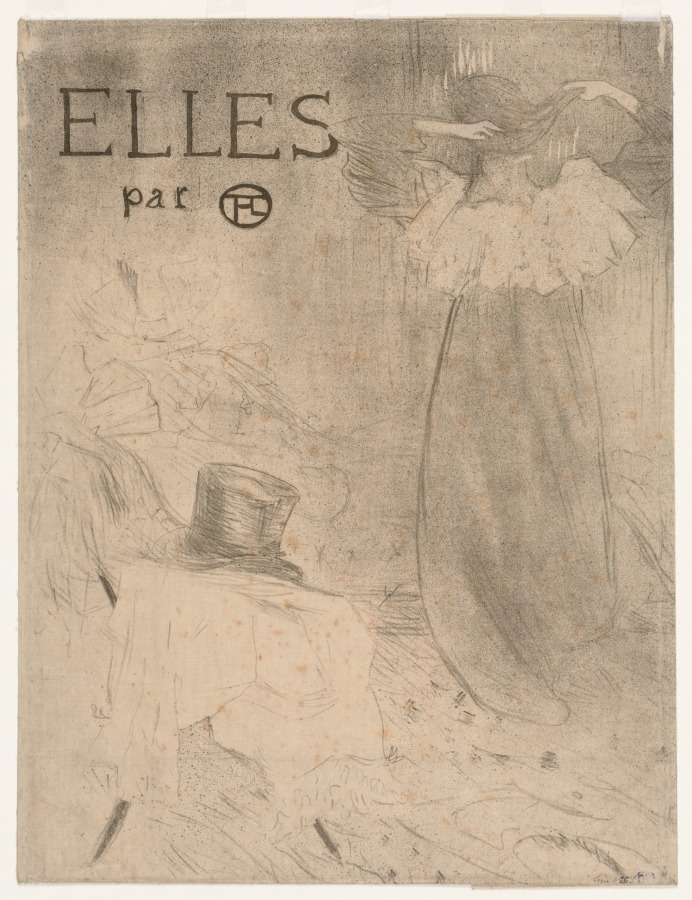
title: Folder for Frontispiece of Elles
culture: France, 19th century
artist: Henri de Toulouse-Lautrec (French, 1864–1901)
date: 1896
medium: lithograph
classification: Print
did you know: This print belongs to a portfolio published by the dealer Gustave Pellet, who created a special luxury paper that featured a watermark of his initials.